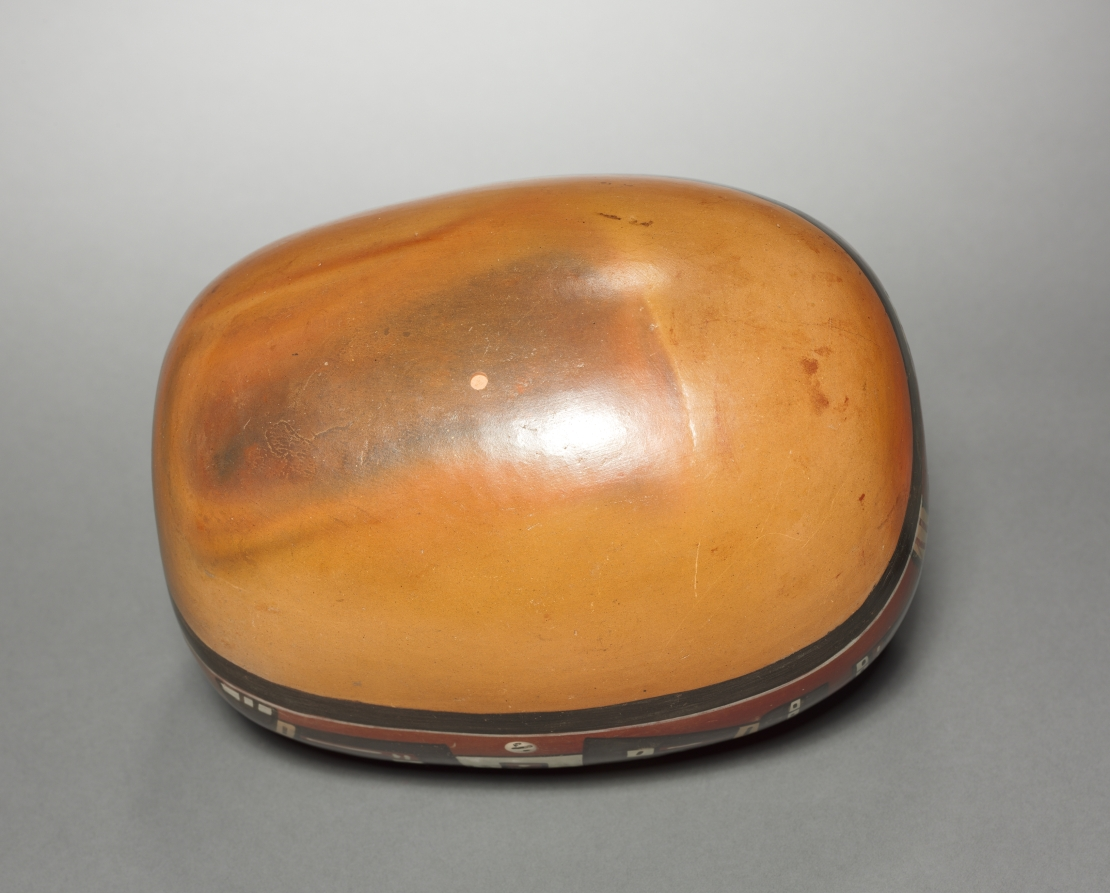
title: Container with Deity Head and Winged Attendants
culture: Central Andes, central coast, coastal Wari style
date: 600–1000 (Thermoluminescence date, 730–1190)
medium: ceramic and slip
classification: Ceramic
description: The head of the staff deity, the most important supernatural being depicted in Wari art, appears on the ends of this container, the function of which is mysterious. The sides feature two of the deity's attendants, each with a wing and N-shaped fangs drawn from the animal world. One of these creatures carries a staff, a supreme symbol of divine authority and power.